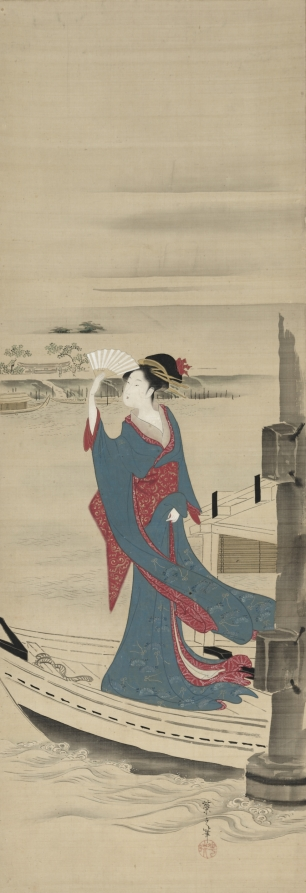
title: Beauty in a Boat on Sumida River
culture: Japan, Edo period (1615–1868)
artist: Chōbunsai Eishi (Japanese, 1756–1829)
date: c. 1801–4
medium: hanging scroll; ink and color on silk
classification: Painting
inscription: artist's signature 栄之筆 and seal, lower right.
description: The Sumida River was a popular refuge from the heat and humidity of the city during the summer. One can see the torii gate of Mimeguri Shrine just to the left of the woman's fan.